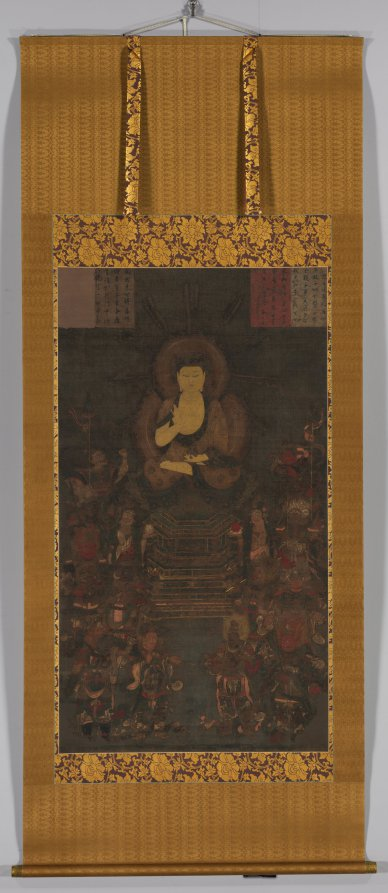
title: Medicine Master Buddha and the Twelve Divine Generals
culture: Japan, Kamakura period (1185–1333)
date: 1200s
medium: Hanging scroll painting; ink, color, gold, and silver on silk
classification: Painting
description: From the 700s, people in Japan began praying to the Medicine Master Buddha (Yakushi Nyorai) for longevity. Yakushi is at the center of this image, flanked by the bodhisattvas of the sun and moon, Nikkō and Gakkō. The Twelve Divine Generals, a group of protective deities, surround him. Yakushi sits in a meditative pose with his right hand in a gesture bestowing fearlessness while his left hand holds a medicine jar. In the upper part of the painting, rectangles simulating decorative paper inscription slips contain excerpts from a sacred text about Yakushi, in which he asks that sick people who speak his name should become well and that all who hear his name might have their purity restored.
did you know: Each of the Divine Generals has an identifying zodiac animal in his hair or headdress.